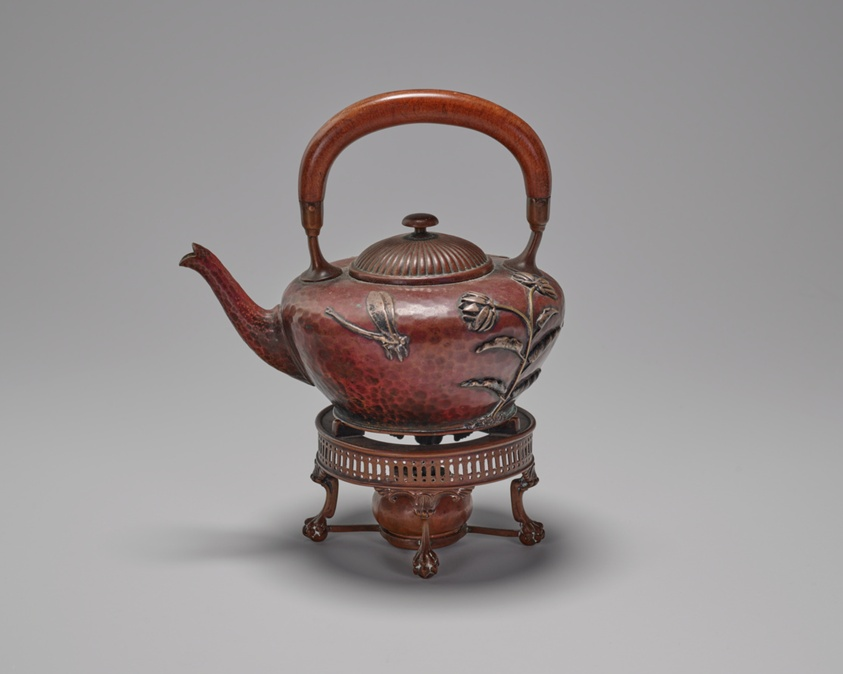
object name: Decorative Arts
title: Tea Kettle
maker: Gorham Manufacturing Company (American, founded 1831); Providence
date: c. 1900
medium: Copper, mixed metals, and wood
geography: Providence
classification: american decorative arts; decorative arts